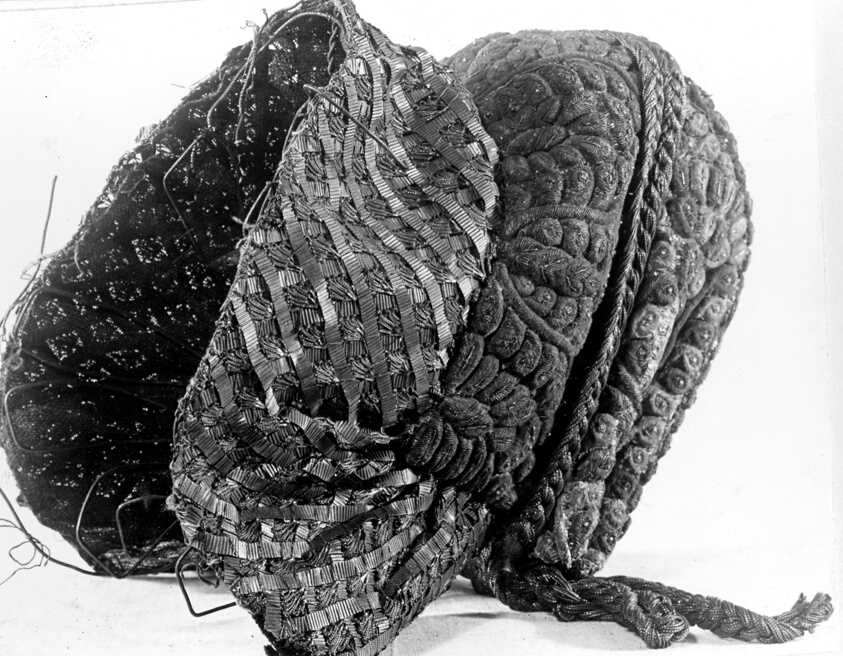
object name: Costume and Accessories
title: Headdress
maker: Austria, Vienna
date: 19th century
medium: Embroidered with wired gold lace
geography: Austria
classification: textile; headdress - needlework; costume accessory - headdress; costume accessory; costume; dress (garment); clothing